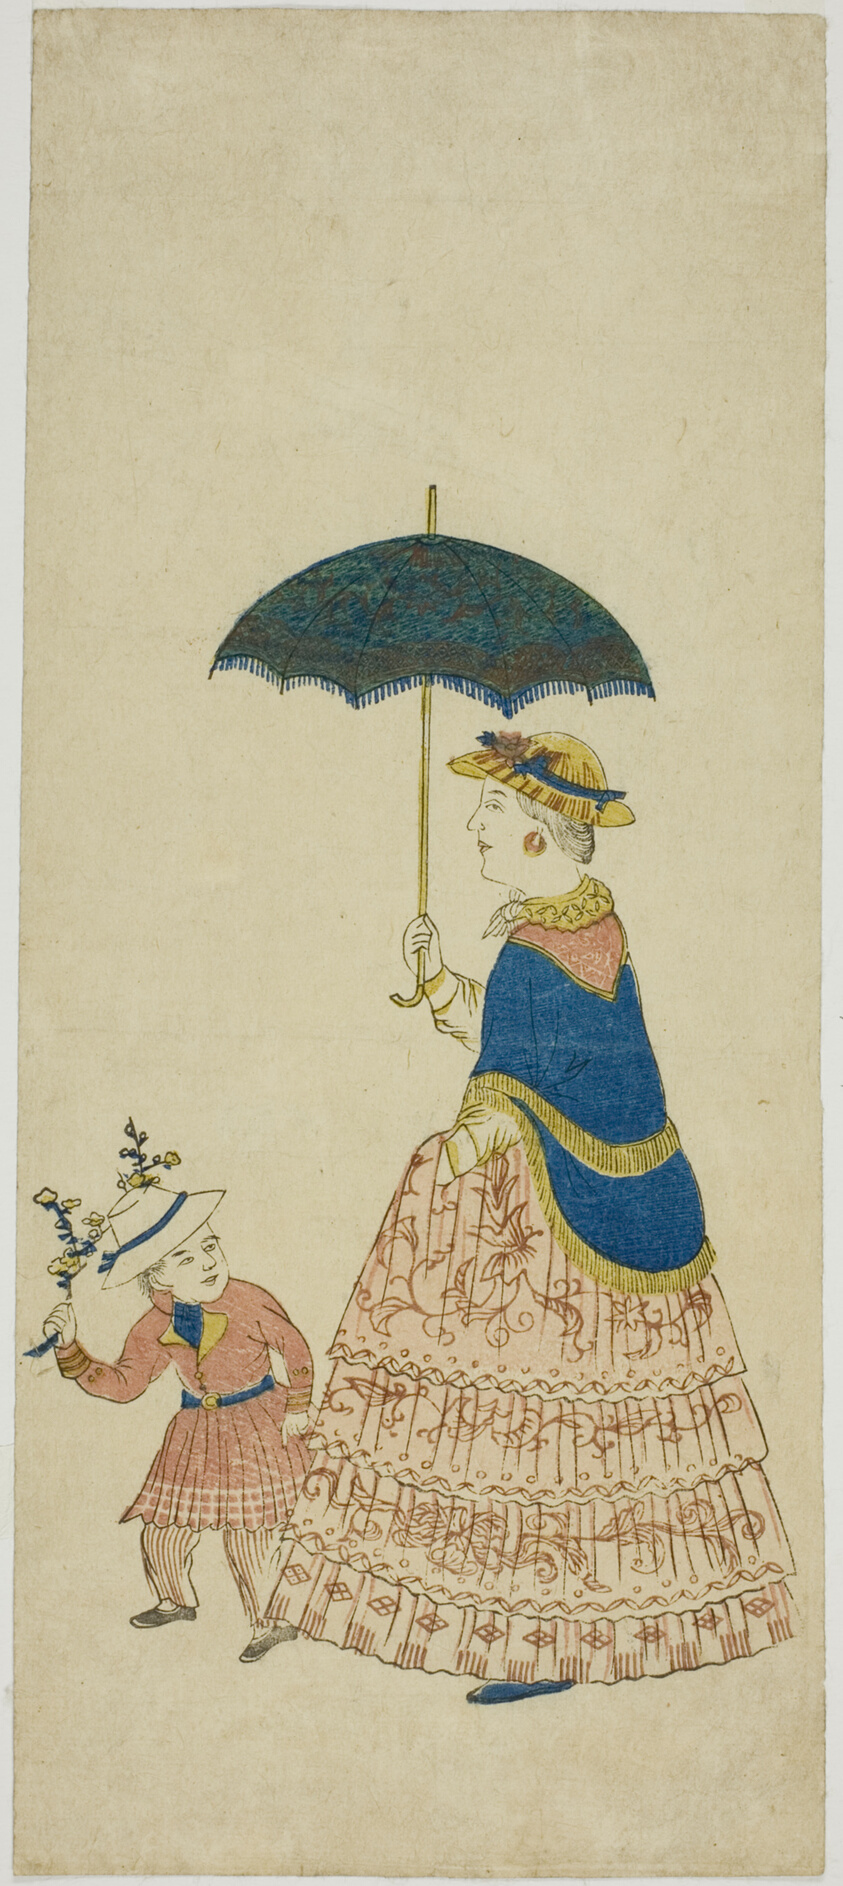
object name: Print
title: Dutch Lady Carrying Parasol with Little Boy 阿蘭陀婦人と子供 (Orando fujin to kodo mo)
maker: Unknown Artist (Japanese, date unknown)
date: 1830s–1850s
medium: Color woodblock print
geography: Japan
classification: woodblock print; print; asian art